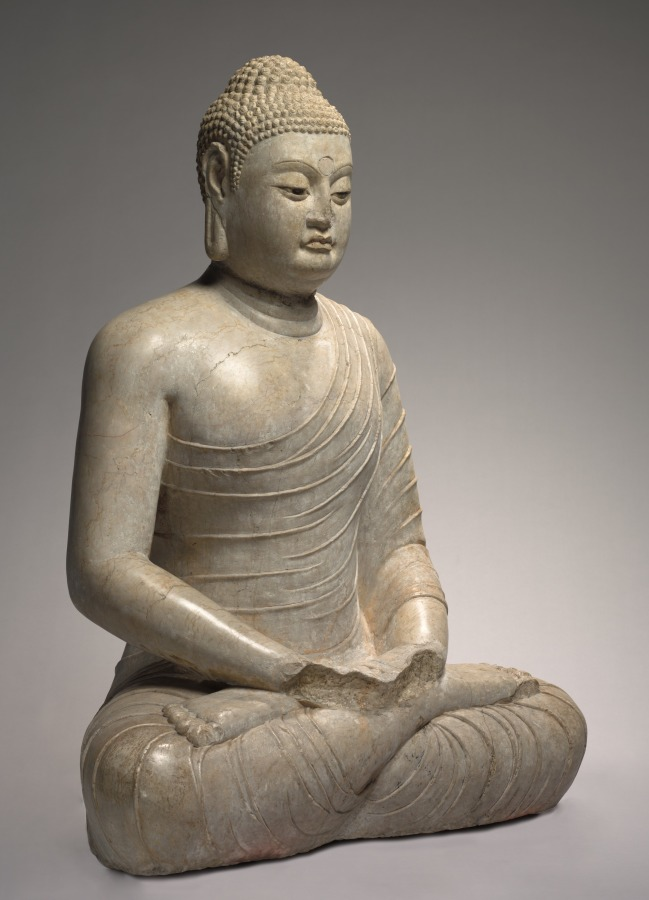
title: Seated Amitayus Buddha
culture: China, Northern Qi dynasty (550-577)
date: c. 570s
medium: marble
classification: Sculpture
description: Amitayus, the Buddha of Infinite Life, is seated in meditation on a double lotus pedestal. The pedestal was not made with the statue but the combination is faithful to the original artistic conception. The statue is an extremely rare example of a major type of Northern Qi Buddhist sculpture. The heavy, massive front highlights the sense of monumentality and the spiritual essence of the Buddha. Today the sculpture is united with a pedestal that exhibits the rich, ornate style of early Tang sculpture. It was commissioned by the Duke of Liang, Fang Xuanling (578–648), for the blessing of his second son and daughter-in-law, the Tang imperial princess of Gaoyang. The iconography and inscription suggest that it originally went with a statue, now missing, of Shakyamuni, the historical Buddha, instead of Amitayus.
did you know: The stringlike folds of the Buddha's draperies emphasize his monumental, rigidly erect torso and tubular limbs.